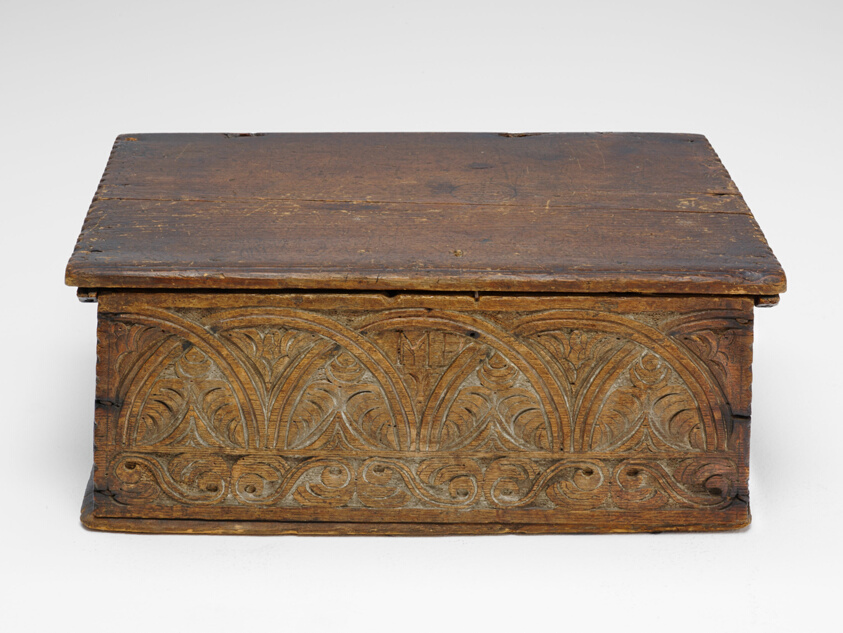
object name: Decorative Arts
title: Box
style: Folk Art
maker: Artist unknown (American, 17th–18th century); Eastern Massachusetts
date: 1650–1700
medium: Red oak and eastern white pine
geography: Eastern Massachusetts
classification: case furniture; box; furniture; american decorative arts; american arts; decorative arts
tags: furniture